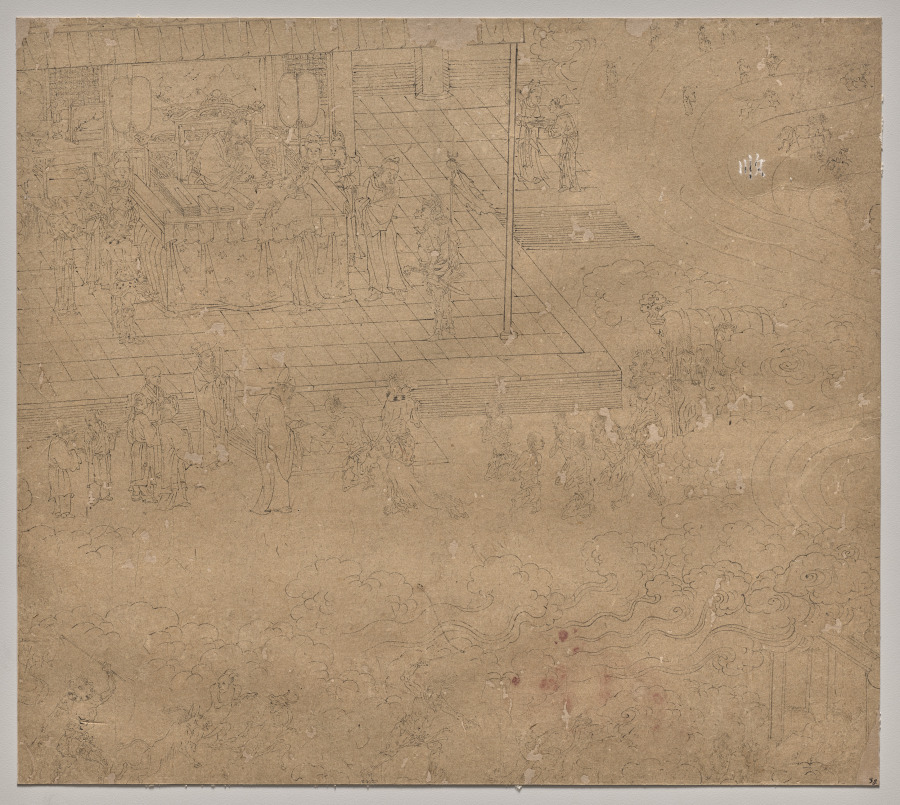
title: Album of Daoist and Buddhist Themes: Kings of Hells: Leaf 38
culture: China, Southern Song dynasty (1127-1279)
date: 1200s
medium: Album, ink on paper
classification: Painting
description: This extraordinary album has 50 paintings on a variety of religious subjects. They were likely created by several master craftsmen to share with studio apprentices as models for fulfilling commissions. The Jade Emperor and the Daoist pantheon make up the first 26 leaves. The next 14 leaves portray the Buddhist Ten Kings of Hell administering punishments to the dead. The third section, called “Clearing the Mountains,” features divine soldiers, led presumably by the deity Erlang Shen 二郎神, fighting undesirable creatures.